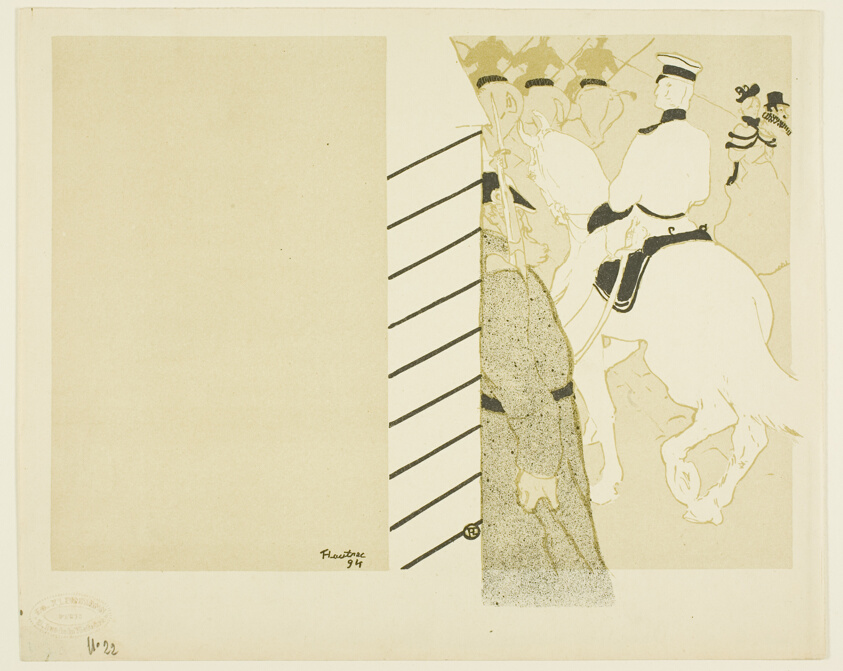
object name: Print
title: Cover for Babylone d'Allemagne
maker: Henri de Toulouse-Lautrec (French, 1864-1901)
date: 1894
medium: Color lithograph on ivory wove paper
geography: France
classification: lithograph; print; prints and drawing